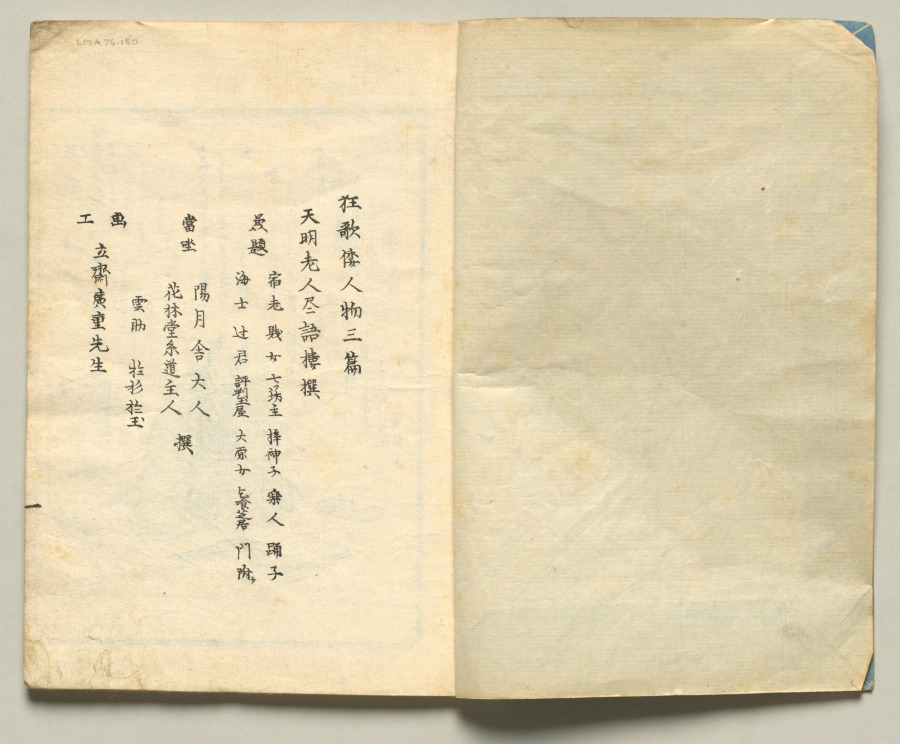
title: Spread One from Volume Three of People of Japan in Light Verse (Kyōka)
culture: Japan, Edo period (1615–1868)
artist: Utagawa Hiroshige (Japanese, 1797–1858)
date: 1857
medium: Woodblock-printed book; ink and color on paper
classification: Bound Volume